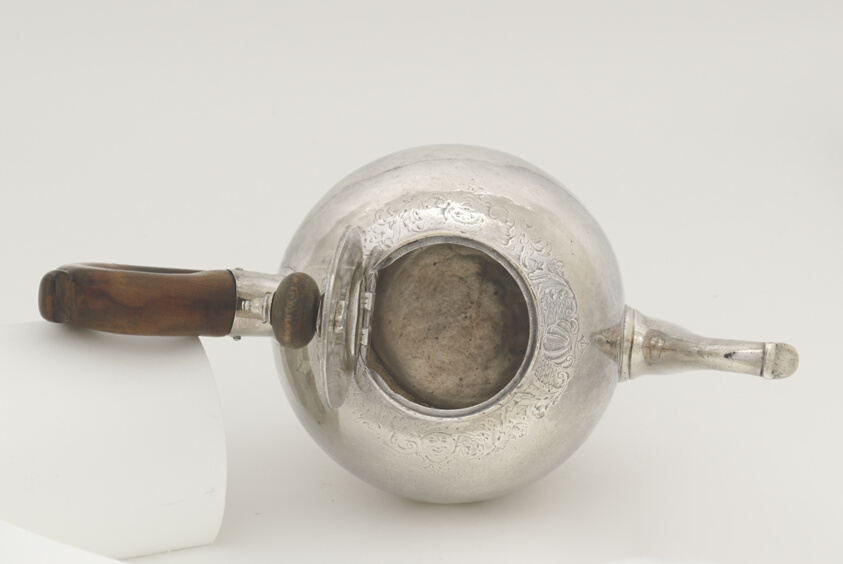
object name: Metalwork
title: Teapot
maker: Jacob Hurd; American, 1702/03–1758; Boston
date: 1740–55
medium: Silver and walnut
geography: Boston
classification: teapot; silver; american decorative arts; american arts; decorative arts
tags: dining, drinking